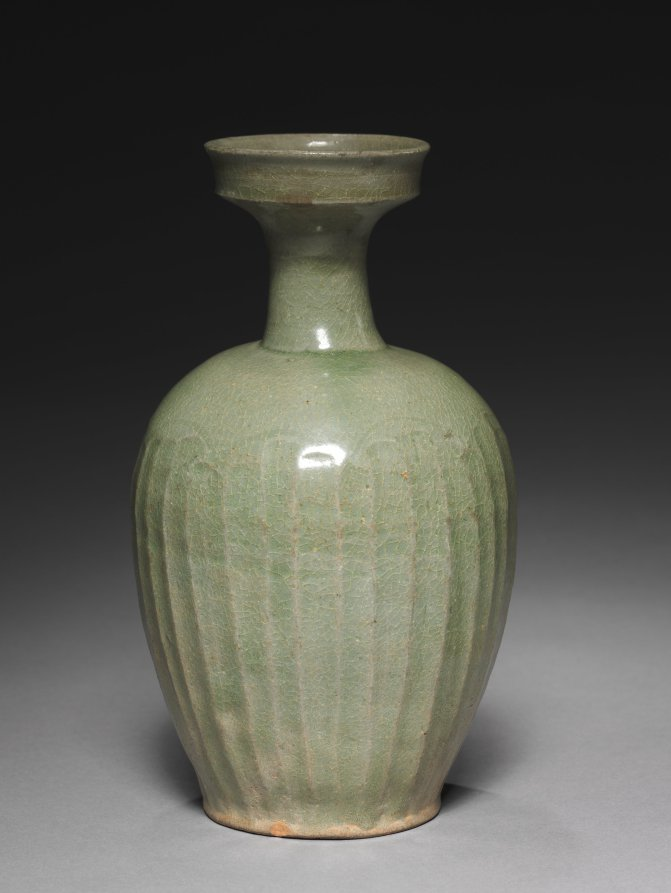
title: Wide-Mouthed Vase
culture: Korea, Goryeo dynasty (918–1392)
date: 1000s–1100s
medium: porcelaneous ware with celadon glaze and fluted and incised decoration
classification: Ceramic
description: As early as the seventh century, the practice of drinking tea and wine became an important part of elite culture in Korea. Elites of the Goryeo period commissioned a variety of types of utensils and vessels including this handsome wine bottle, to make their drinking experience more exciting.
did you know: The translucent greenish and bluish glaze of Goryeo celadons, shown in this vase, is the result of distinctive small and long Korean kilns, which maintained a low oxygen saturation with a high level of carbon dioxide.